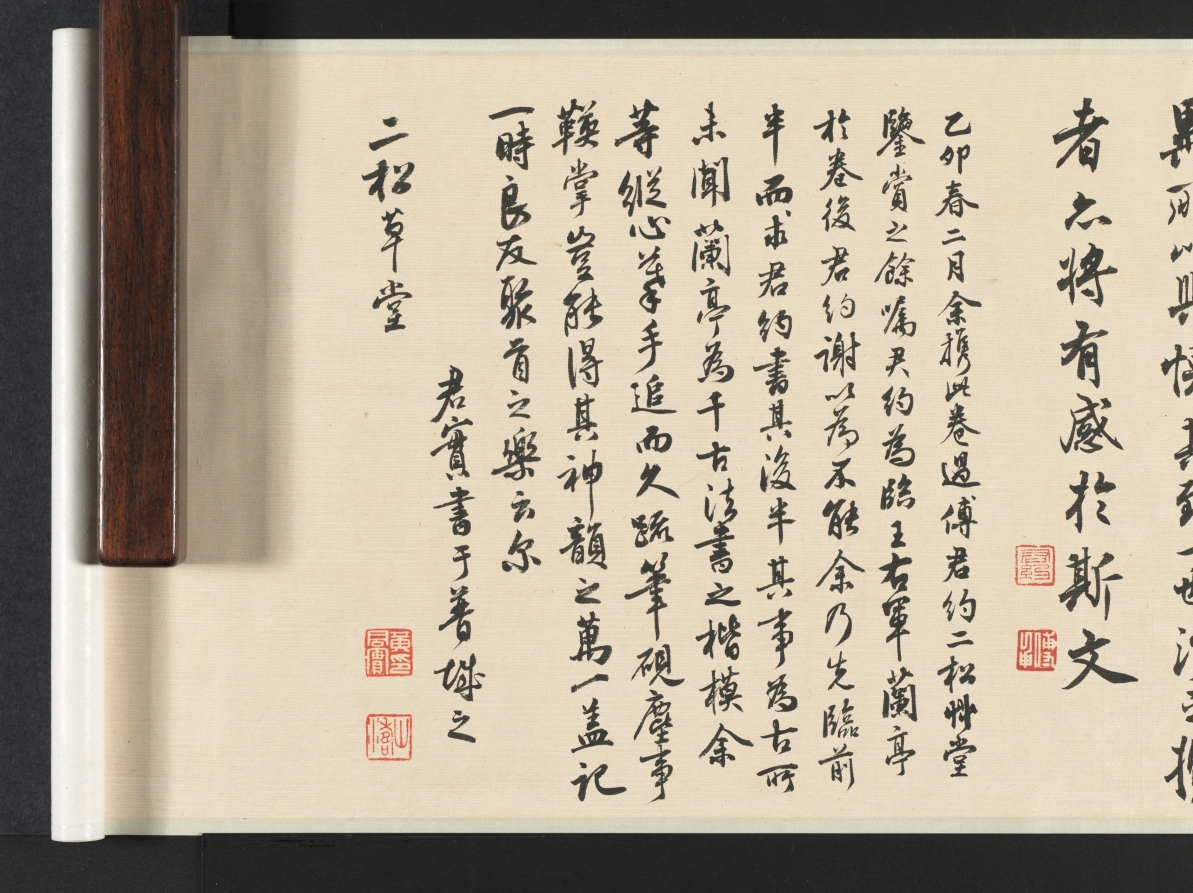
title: Purification at the Orchid Pavilion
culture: China, Qing dynasty (1644-1911)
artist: Fan Yi (Chinese, c. 1615–before 1688)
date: 1671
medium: Handscroll; ink and color on silk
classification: Painting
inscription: Artist's inscription, signature, and 2 seals: Painted by Fan Yi of Zhongfu during the second month of winter of the xinhai year [1671]. [2 seals] Fan Yi zhi yin, Zi yu yi.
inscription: Title on the frontispiece by Monk Yueshan (1629-1709).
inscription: 3 colophons and 13 additional seals: 1 colophon, dated 1707, and 6 seals of Yueshan; 2 colophons and 3 seals of Wong Kwan-Shut (Huang Junshi) 黃君實 (b. 1934); 2 seals of Fu Shen 傅 申 (b. 1937); 2 seals of Tessai Tomioka 富岡鐵齋 (1836-1924).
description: By the 1600s, the historic gathering at Lanting, Zhejiang province, in 353 CE was a common theme in Chinese painting. Originally based on a composition attributed to Li Gonglin (1049– 1106), now lost, Wu school artists revived the theme. Fan Yi, the brother of the artist Fan Qi from Nanjing, used delicate brushwork and luminous colors to depict the spring gathering.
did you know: The gathering’s host is in the Orchid Pavilion at the end of the scroll, representing an episode known as “Wang Xizhi Watching the Geese 王羲之觀鵝圖.”